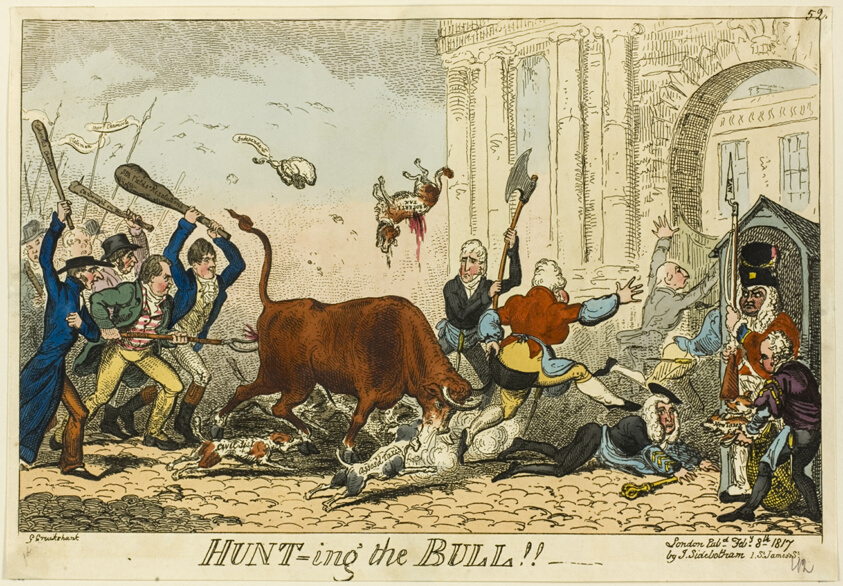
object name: Print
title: Hunt-ing the Bull!!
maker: George Cruikshank (English, 1792-1878); published by J. Sidebotham (English, active 1802-1820)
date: published February 8, 1817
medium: Hand-colored etching on paper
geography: England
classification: etching; print; prints and drawing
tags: dogs, animals